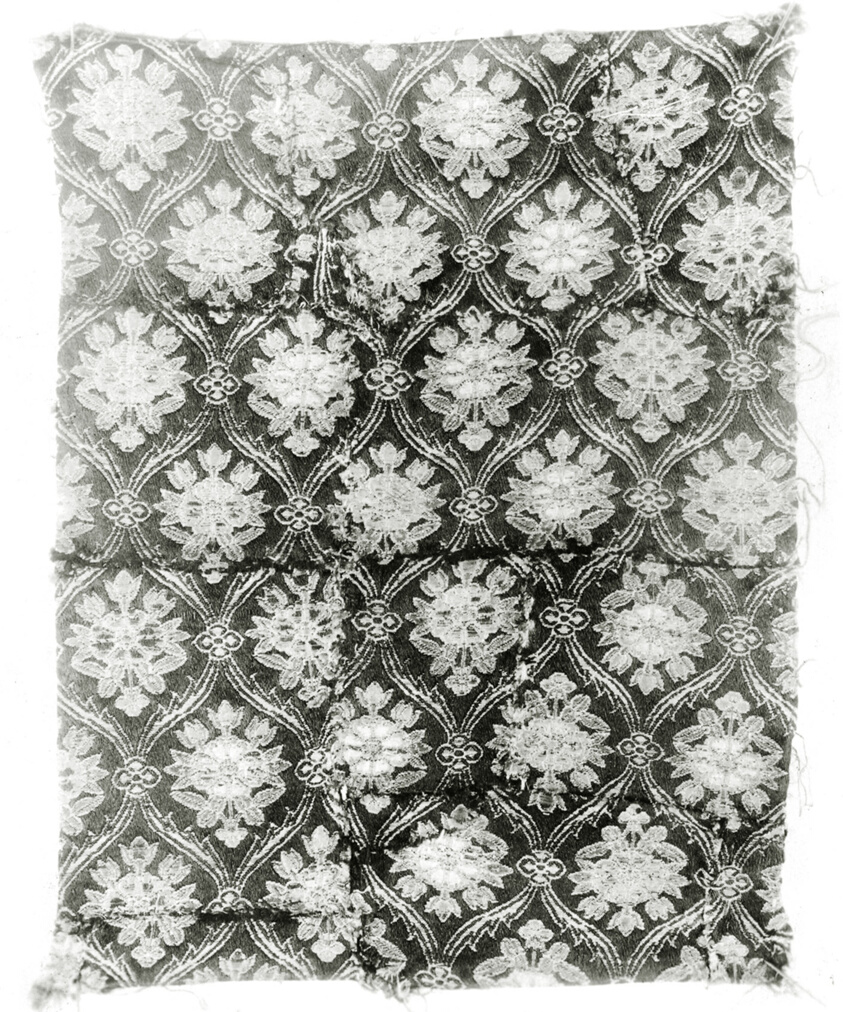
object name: Textile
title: Fragment (Dress Fabric)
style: muhammad mirza, akkoyunlu, kashan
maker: Iran (Persia, Kashan)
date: 18th century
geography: Iran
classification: textile; weaving